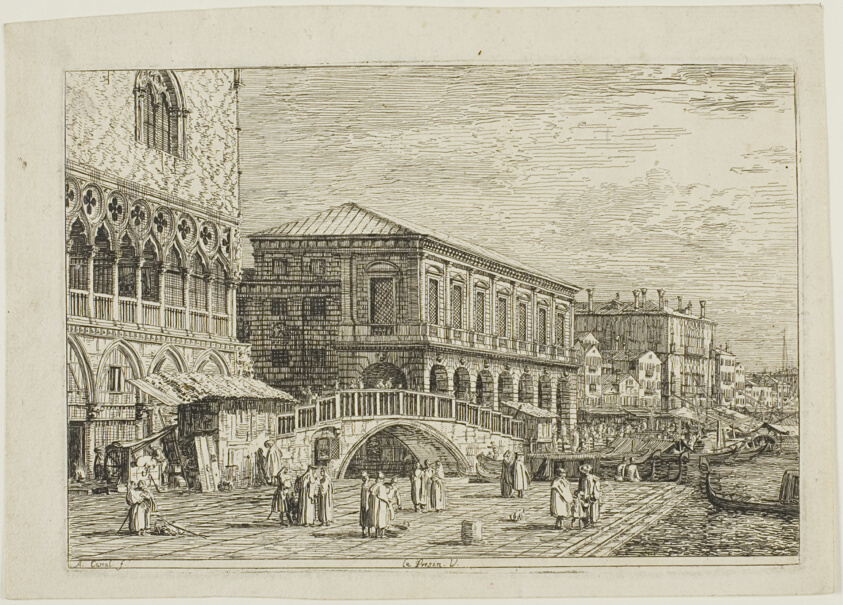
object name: Print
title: le Preson. V., from Vedute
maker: Canaletto (Italian, 1697-1768)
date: 1735/44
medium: Etching in black on ivory laid paper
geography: Italy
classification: etching; print; prints and drawing